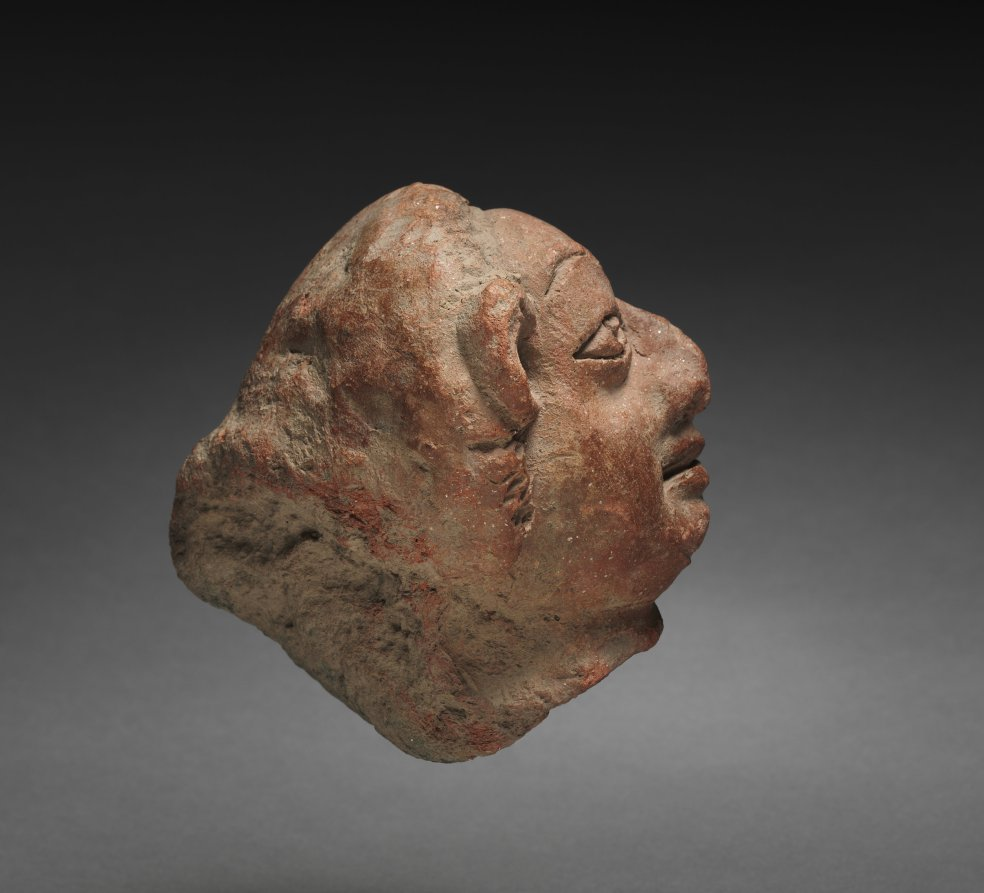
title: Grotesque Male Head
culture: India, Gupta period (320–647)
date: c. 400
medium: terracotta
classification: Sculpture